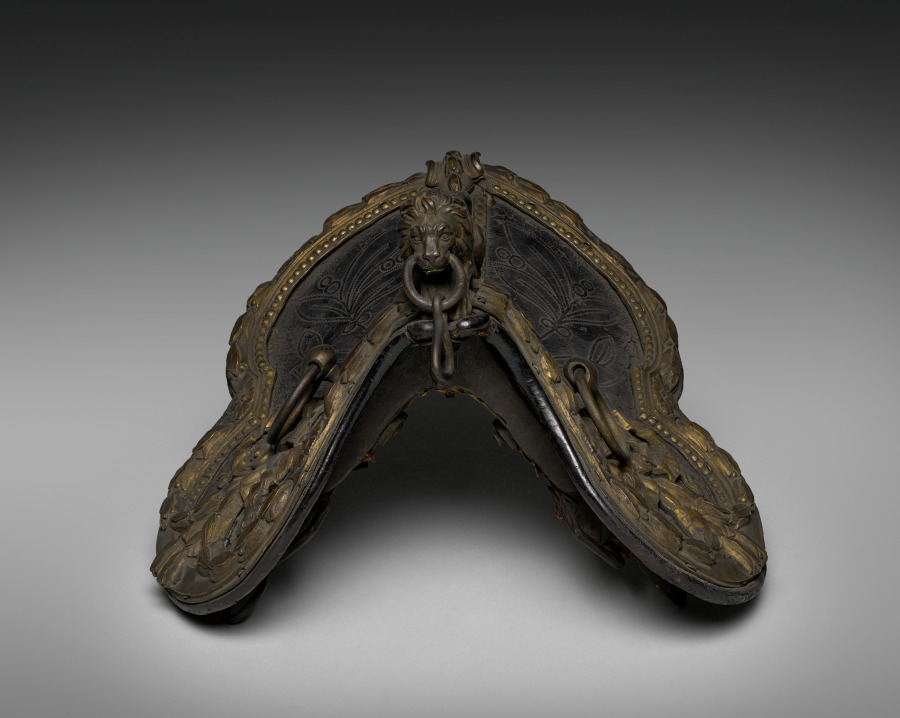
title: Child's Harness Saddle with Lion Pommel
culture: France, 17th century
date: 1600s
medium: leather, tooled with wood, canvas and steel on a brass frame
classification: Arms and Armor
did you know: This child-sized harness saddle was said to have been used in a riding school.